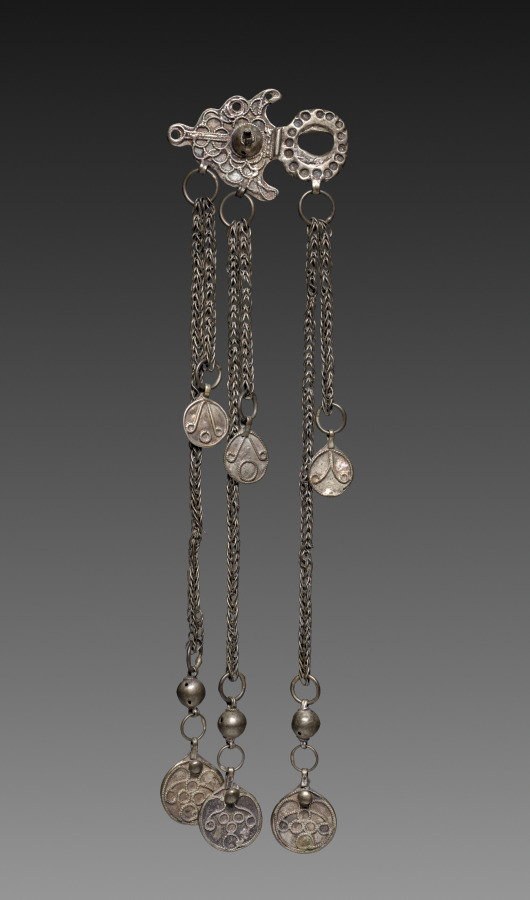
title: Clasp (part 1)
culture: Palestine, Ramallah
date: early 1900s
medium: silver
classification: Jewelry